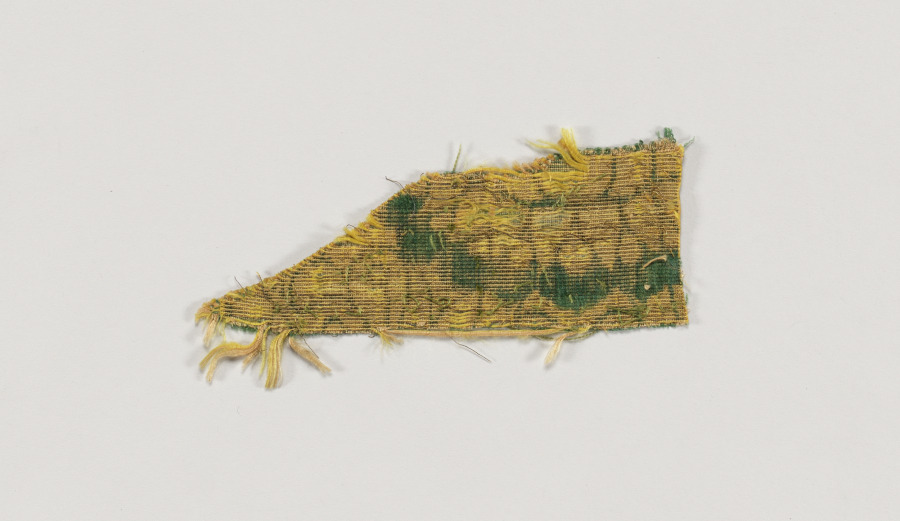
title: Velvet Fragments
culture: Spain, early 16th century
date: early 16th century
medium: velvet (cut, voided, and brocaded): silk and gold thread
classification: Velvet